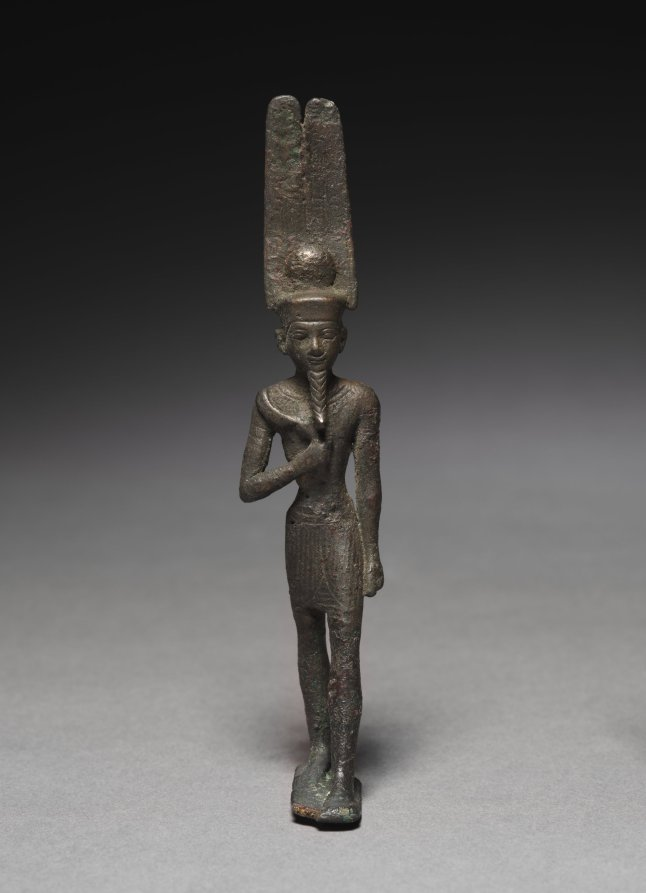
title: Statuette of Amen-Ra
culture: Egypt, Late period (715–332 BCE), Dynasty 26 or later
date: 664–525 BCE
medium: bronze, solid cast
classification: Sculpture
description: In this statue of Amen-Ra, the principal deity of the ancient Egyptian city of Thebes, his sun disk and double plume crown (here viewable as partial remains) represent his mystical powers, such as bringing light to the sky. In the Rick Owens ensemble, a light bulb helmet is reminiscent of the physical and mythological characteristics of Amen- Ra’s double plume crown. After a trip to Egypt, Owens designed his fall 2022 men’s collection, which centered around symbols associated with ancient Egyptian deities, playing into the mainstream mystical interest about that religion.